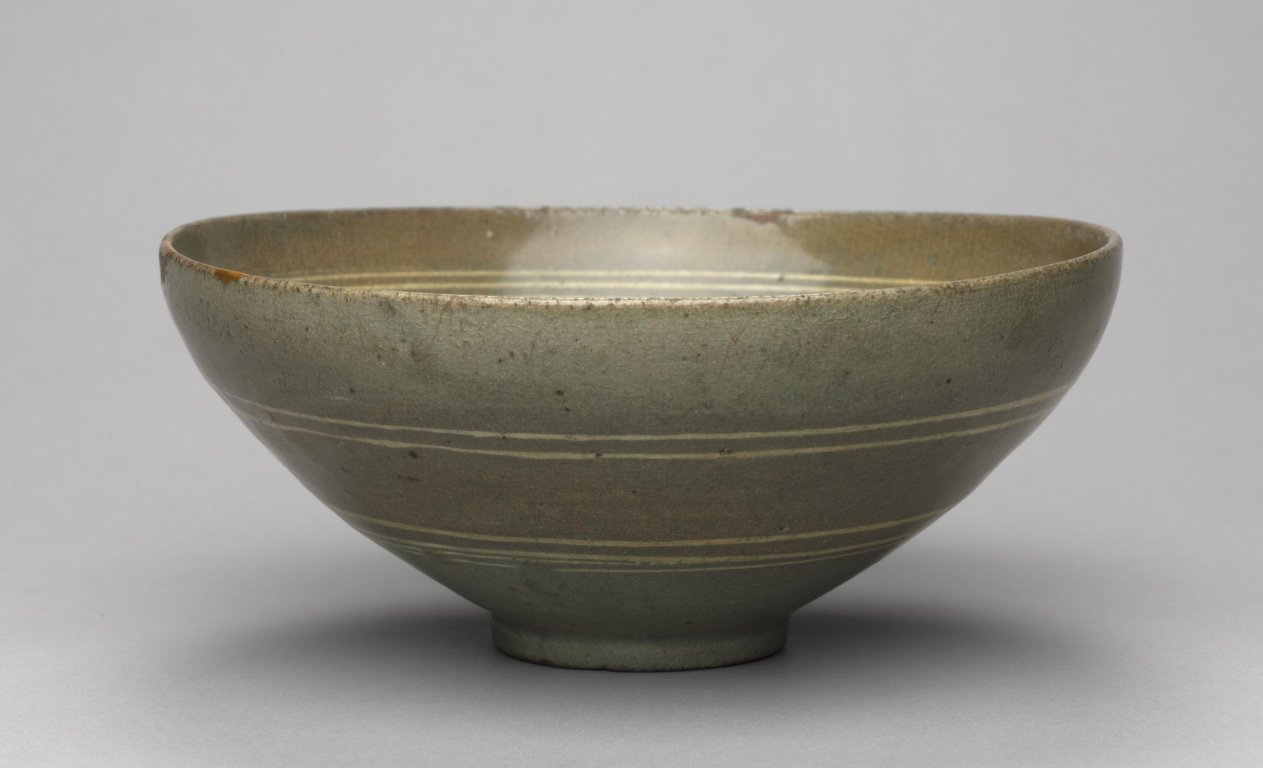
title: Bowl with Willow and Reed Design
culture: Korea, Goryeo dynasty (918–1392)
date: 1300s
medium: pottery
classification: Ceramic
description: A wide bowl like this example was especially suitable for drinking powdered tea shaved from a compressed tea cake, the most commonly enjoyed type during the Goryeo period. The inlaid image of weeping willow trees appears as a main decoration pattern on the inner wall of this bowl.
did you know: This bowl with a lightly bent inward rim possibly takes the shape of an alms bowl by Buddhist monks.